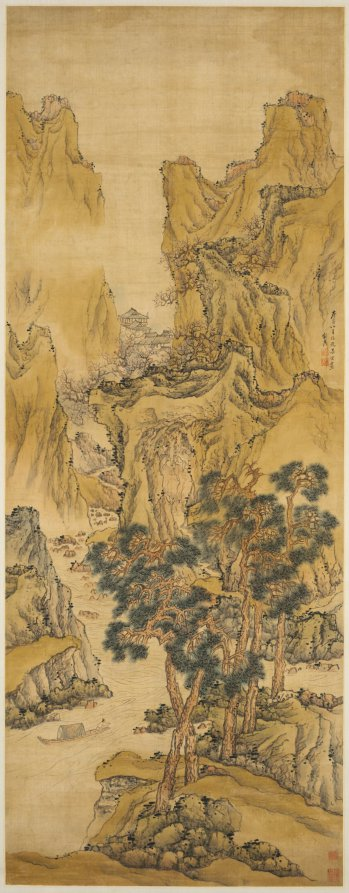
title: The Peach Blossom Spring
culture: China, Ming dynasty (1368–1644)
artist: Liu Du (Chinese, active c. 1628-after 1653)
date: 1650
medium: hanging scroll; ink and light color on satin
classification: Painting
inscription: Artist's inscription, signature, and 2 seals at middle right edge: In the tenth month of the gengyin year [1650], painted in imitation of Zhao Chengzhi [Chao Mengfu]. Liu Du [seals] Liu Du zhi yin; Shu xian.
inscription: 2 additional seals of Low Chuck Tiew 劉作籌 (1911–1993).